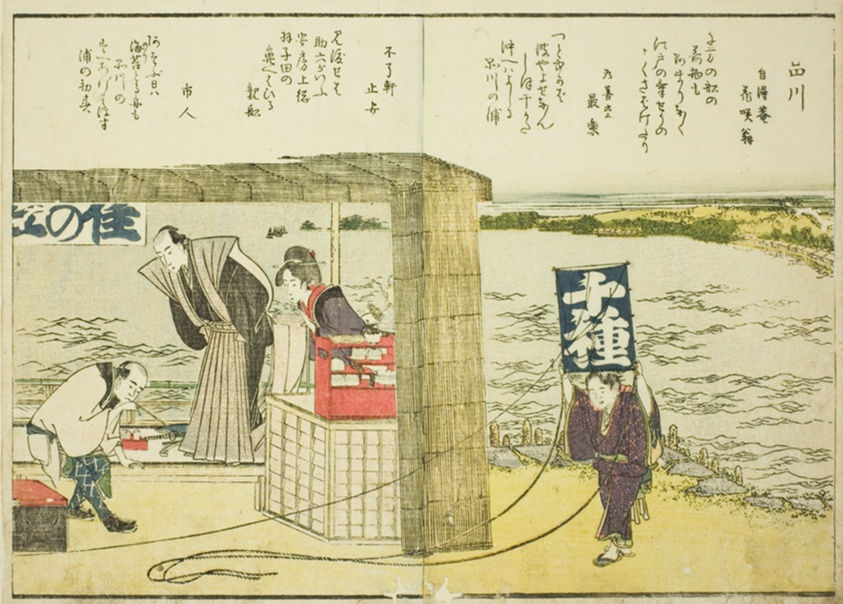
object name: Print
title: Shinagawa, from vol. 1 of the illustrated book "Fine Views of the Eastern Capital at a Glance (Toto shokei ichiran)"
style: Japanese (culture or style)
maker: Katsushika Hokusai 葛飾 北斎; Japanese, 1760-1849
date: 1800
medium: Color woodblock print; double-page illustration from book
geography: Japan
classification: woodblock print; print; asian art